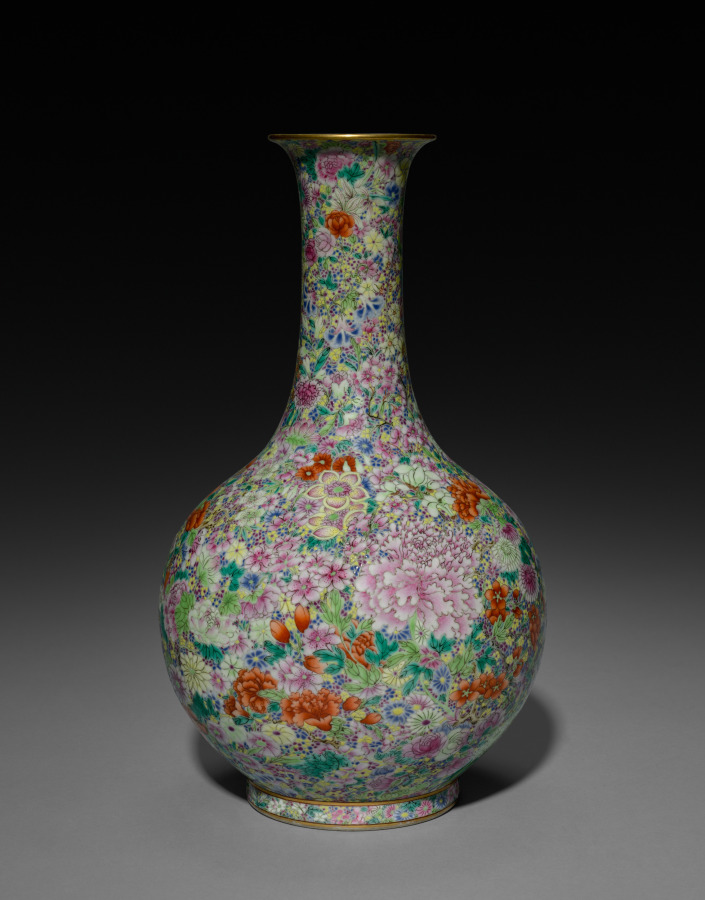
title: Bottle-Shaped Vase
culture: China, Qing dynasty (1644–1911), Jiaqing reign (1796–1820)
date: 1796–1820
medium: Porcelain, overglaze colors and gold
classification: Ceramic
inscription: 大清嘉慶年制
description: This vase is densely decorated with peonies, morning glories, lilies, and lotuses. Purple, yellow, and blue petals fill the surface, forming a continuous millefleur (thousand-flower) pattern. Each petal is delicately shaded to suggest volume and depth, creating a vivid yet orderly composition. The mouth is painted with gold pigment to imitate metal, evoking the appearance of copper-body-painted enamel as seen in Qing dynasty court art. Qing palace records indicate that vases with such patterns were used in everyday flower-viewing displays. In late Qing inventories, comparable examples were listed as furnishings for the emperor and his consorts.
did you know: Porcelain with this dense floral millefleurs decoration and a multitude of overglaze enamel colors was first made in the Qing dynasty and remained popular into the late 1800s.